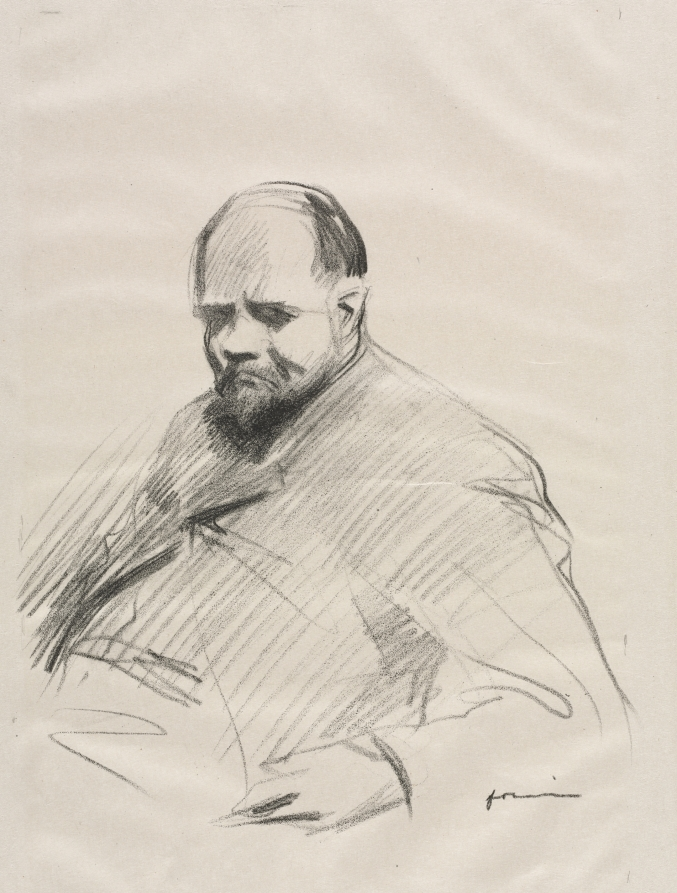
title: Ambroise Vollard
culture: France, 19th-20th century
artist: Jean Louis Forain (French, 1852–1931)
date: c. 1910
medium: lithograph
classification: Print